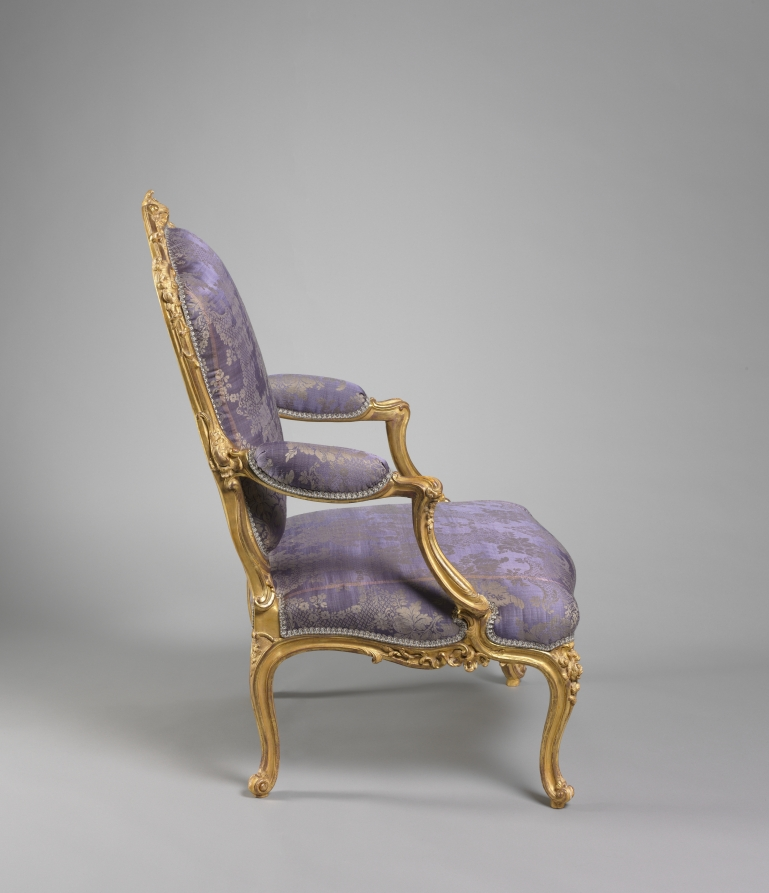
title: Armchair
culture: France, 18th century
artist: attributed to Nicolas Heurtaut (French, 1720–1771)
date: c. 1755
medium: carved and gilded wood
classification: Furniture and woodwork